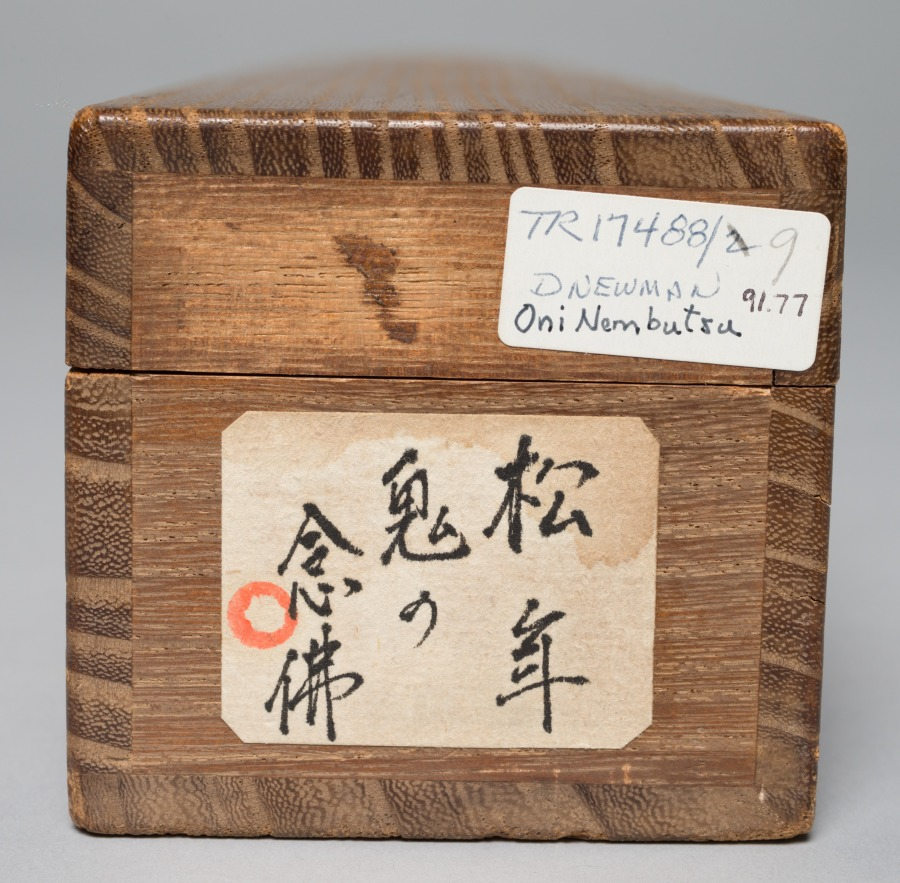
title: Demon Intoning the Name of the Buddha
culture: Japan, Meiji period (1868–1912)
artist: Suzuki Shōnen (Japanese, 1849–1918)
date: late 1800s–early 1900s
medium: hanging scroll; ink and color on silk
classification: Painting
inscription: artist's inscription, signature, and seal upper left.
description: Among the subjects of souvenir paintings made since the 1600s in Ōtsu, a travel hub near Kyoto in western Japan, was a demon in monk’s robes reciting the name of the Buddha Amida to the rhythm of his gong. Ōtsu paintings largely disappeared with the advent of rail travel in the late 1800s, as people no longer stopped in the area. In this work, Kyoto-based artist Suzuki Shōnen reimagined the demon for the modern era—the simple figure from the Ōtsu painting is transformed into a realistic one accompanied by a calligraphic meditation on its nature.